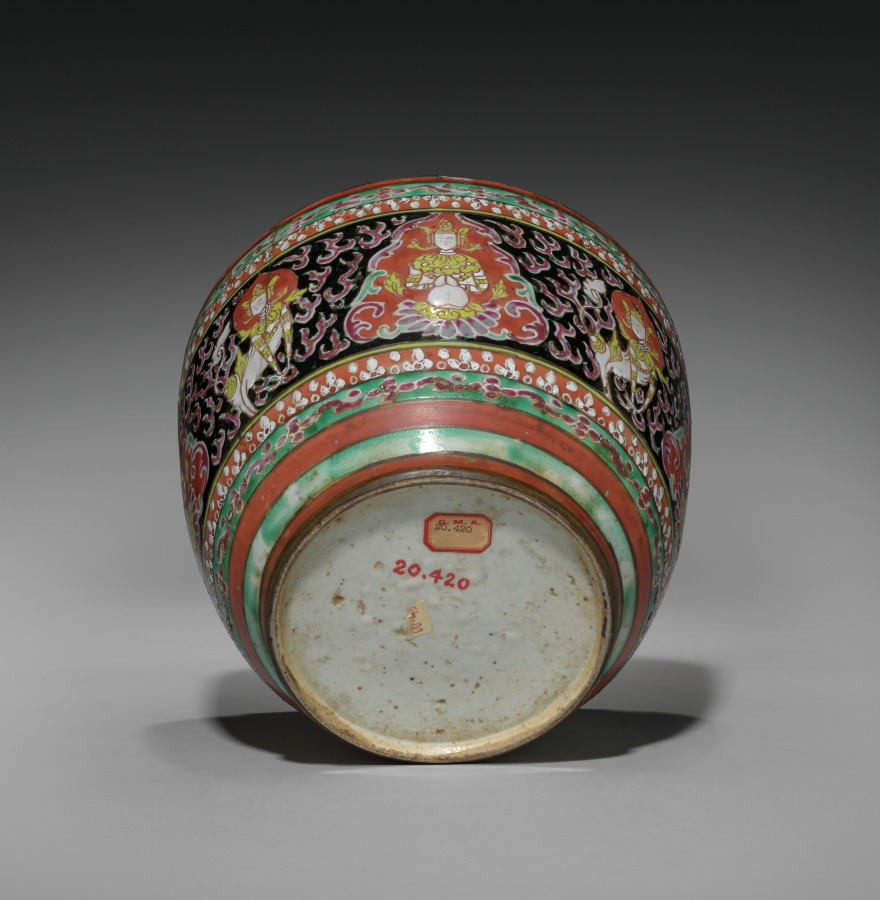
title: Jar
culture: Siam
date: 1800s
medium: porcelain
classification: Ceramic